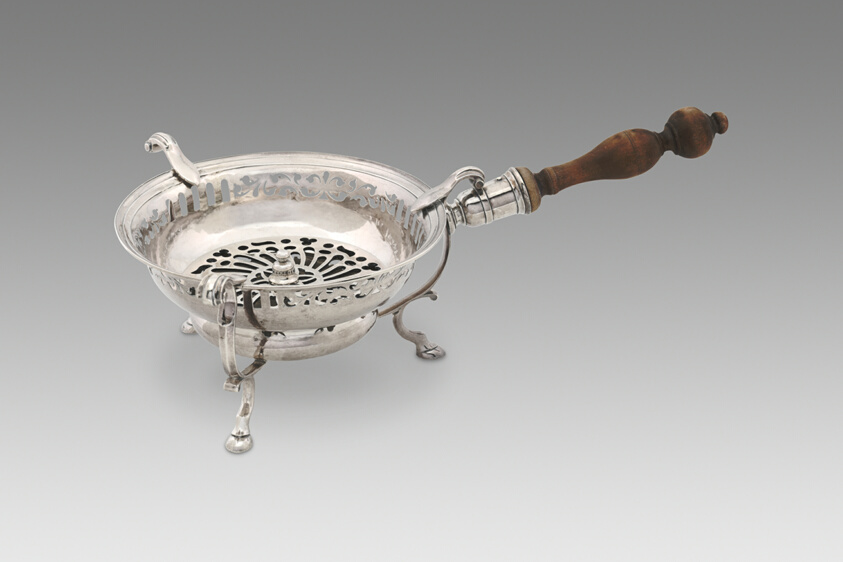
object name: Metalwork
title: Chafing Dish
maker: John Burt; American, 1692/93–1745/46; Boston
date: c. 1730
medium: Silver and wood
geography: Boston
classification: dish (vessel); silver; american decorative arts; american arts; decorative arts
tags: dining, drinking